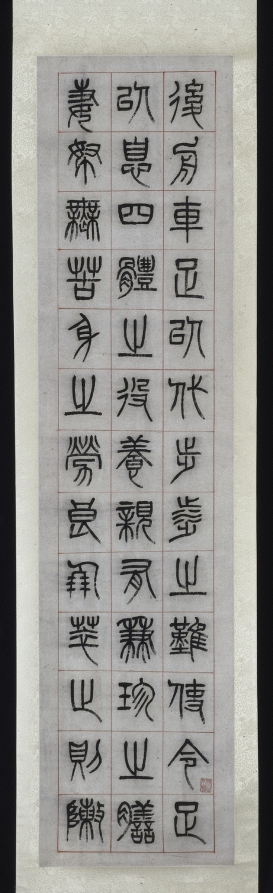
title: On Happiness, Calligraphy in Seal Script Style (zhuanshu)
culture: China, Changsu, Qing dynasty (1644-1911)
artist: Yang Yisun (Chinese, 1813–1881)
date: 1871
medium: hanging scoll, ink on paper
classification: Painting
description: Yang Yisun transcribed this ancient text on six narrow scrolls, starting at the top right and ending at the bottom left. Yang emphasizes the text’s historic nature by using the seal script style found on stone steles and bronze vessels. On Happiness features reflections of a scholar on a leisurely life in the countryside, composed by Han dynasty official Zhongchang Tong, who died the year the Han dynasty collapsed (AD 220). The idyllic life described in the text may bean evocation of the past in a time of national crisis. A decade before Yang wrote these scrolls, Anglo-French forces had looted and burned the Summer Palace in Beijing. At the same time, the domestic Taiping rebellion (1850–64), led by a religious fanatic to overthrow the Qing government, had devastated Yang’s homeland, the Jiangnan region, with an estimated 20 million lives lost.